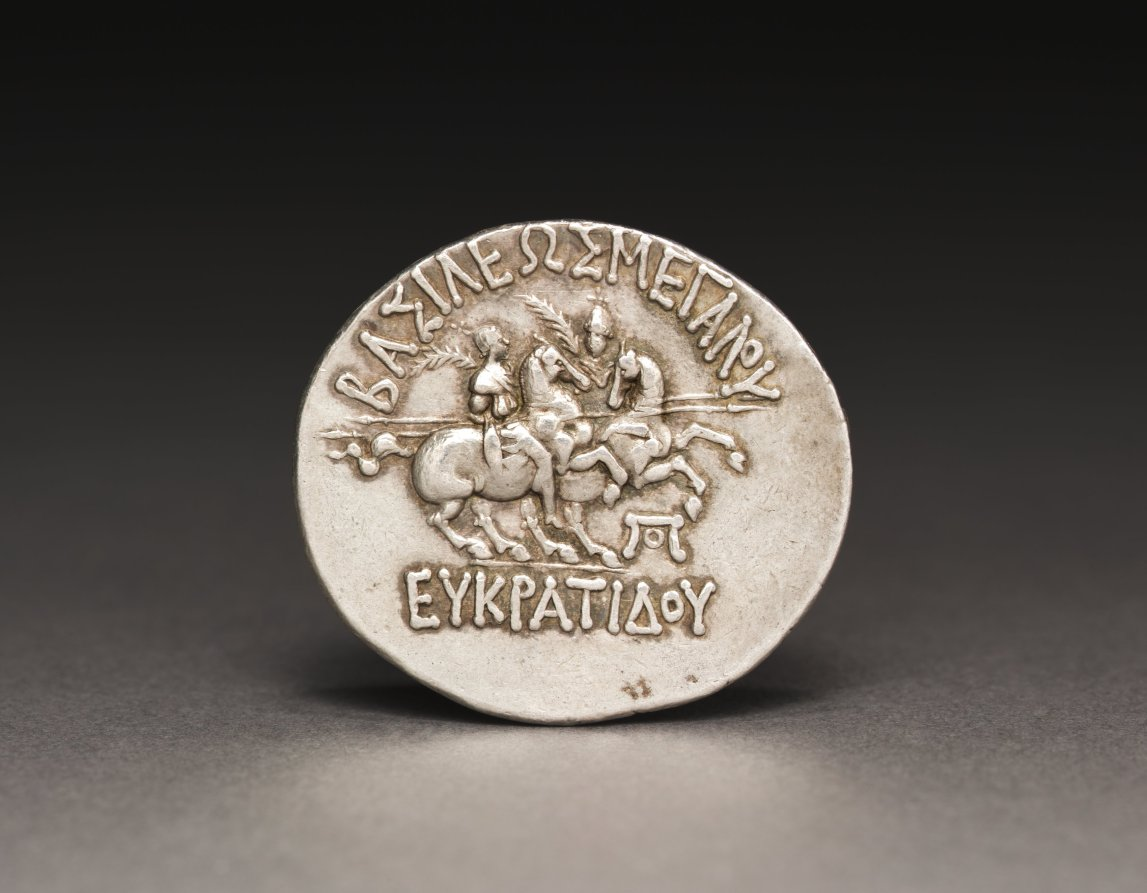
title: Coin of Eukratides I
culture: Afghanistan, Bactria, Eucratides I (171–145 BCE)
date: 170–145 BCE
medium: silver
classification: Coins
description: After Alexander of Macedon succeeded in conquering Egypt and Persia in 331 BC, his ambition to rule the known world led him further east across Bactria in Afghanistan, through the Hindu Kush mountain pass, and into India. There he succeeded in defeating all the local kings of the region until his men, on the brink of mutiny, insisted that they return to Greece. Alexander left governors in charge of his territories, and after his death in 323 BC, his governors became independent kings, establishing Hellenistic cities and a Greek cultural base in the region, which lasted for almost 200 years. The king of Greek descent who ruled over territories in Afghanistan and Pakistan depicted himself with the brimmed military helmet with the bull's ear and horn of Poseidon, worn by generals from Macedon, the northern Greek country from which Alexander came. After his death, Alexander's vast empire that stretched from Macedon across Egypt and Persia all the way to the Indus River was divided among military leaders in his army. On the reverse side of this coin are the twins Castor and Pollux riding horseback with long spears. These twins were sons of Zeus. Since Alexander considered himself to be an offspring of Zeus, Eukratides referenced his link to Alexander by including them on his coin.